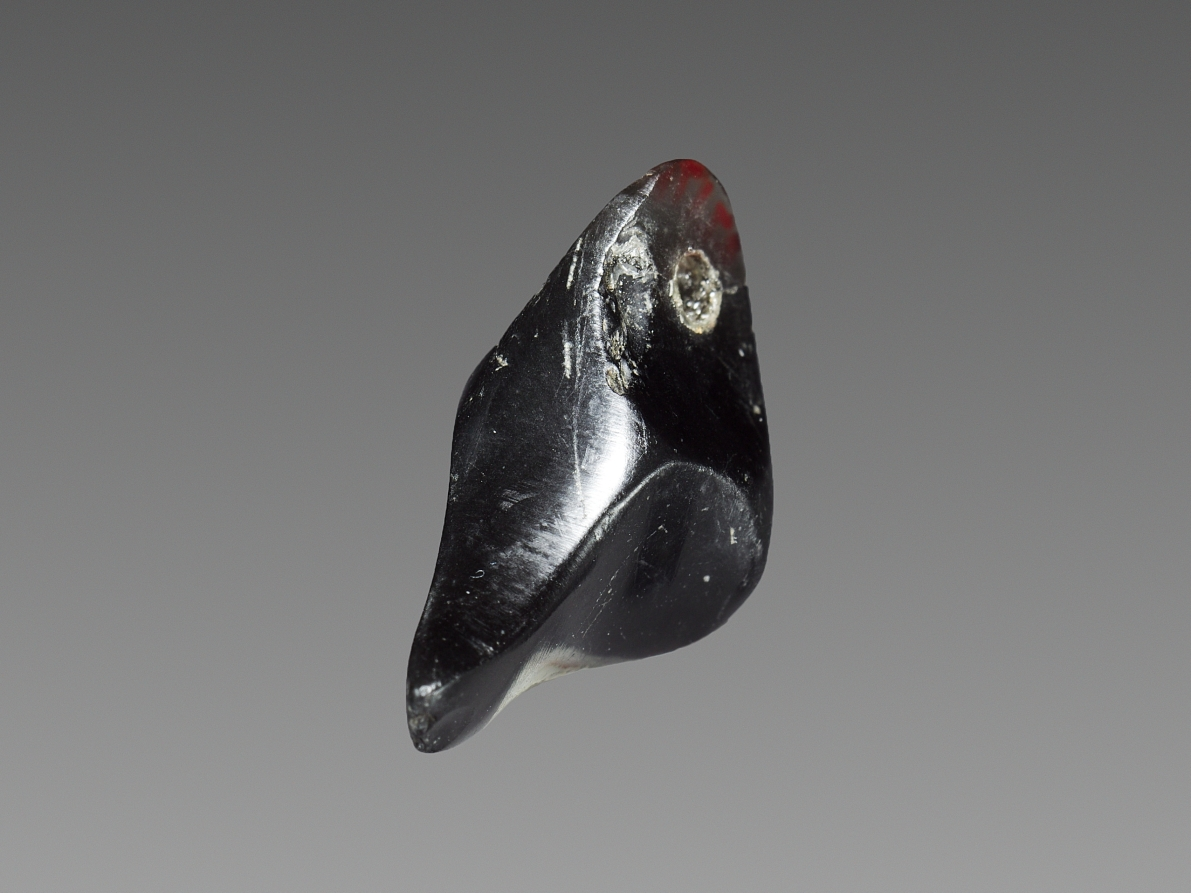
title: Bird Head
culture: Mexico, Valley of Mexico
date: before 1947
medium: obsidian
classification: Stone